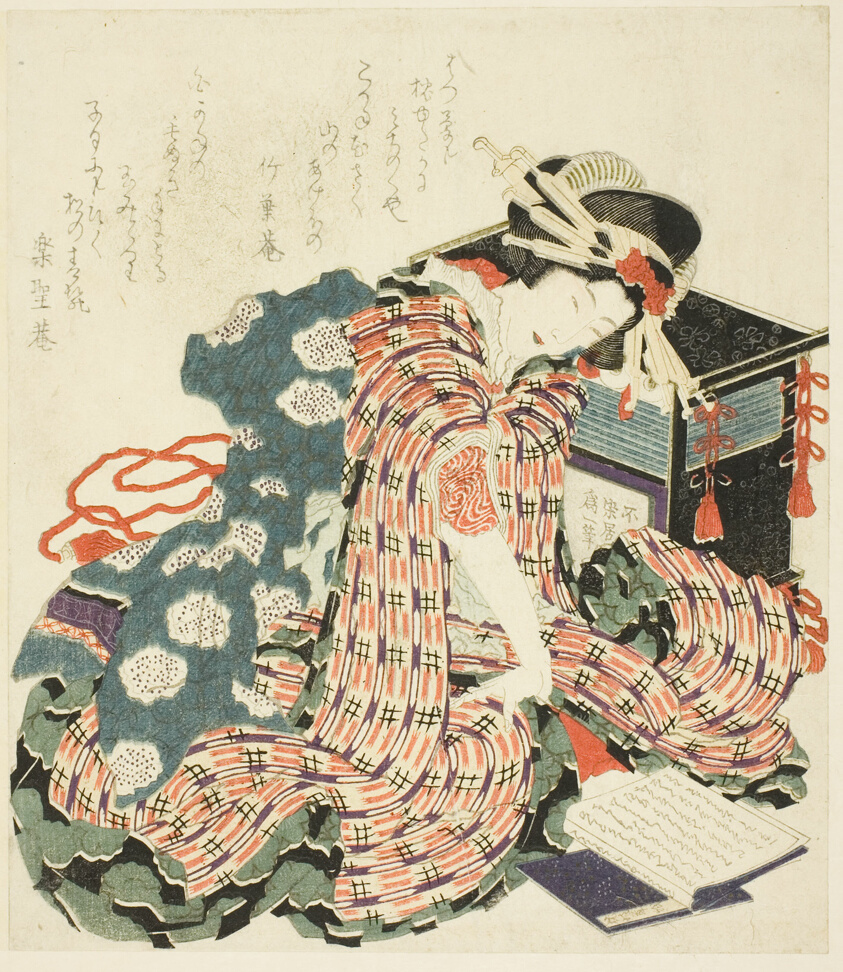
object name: Print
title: Young woman reading "The Pillow Book (makura no soshi)"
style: Japanese (culture or style)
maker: Katsushika Hokusai 葛飾 北斎; Japanese, 1760-1849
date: 1822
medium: Color woodblock print; shikishiban, surimono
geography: Japan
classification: woodblock print; print; asian art